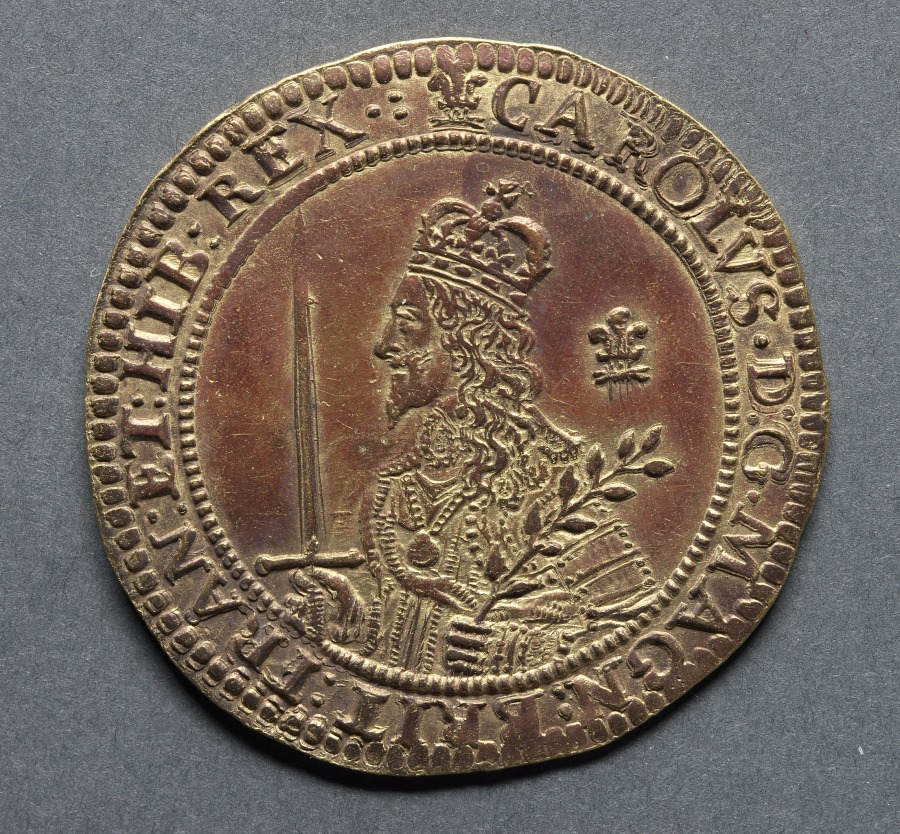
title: Triple Unite or Three Pound Piece: Charles I (obverse); Declaration on Scroll (reverse)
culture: England, Charles I, 1625-1649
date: 1643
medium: gold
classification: Coins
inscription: CAROLUS DG MAG BRIT FRAN ET HIB REX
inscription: III RELIG PROT LEG ANG LIBER PAR 1643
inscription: EXURGAT DEUS DISSIPENTUR INIMICI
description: When the Civil War or Great Rebellion started in 1642, Charles I, having raised his standard at Nottingham on August 22, 1642, fought his way south through the battles of Edgehill and Brentford, but failing to enter London he finally set up his headquarters at Christ Church College, Oxford. At Wellington, Shropshire, on September 19, the king had declared to the that he would protect "the religion of the Protestants, the laws of England, (and) the liberty of Parliament." This declaration, abbreviated and rendered in Latin, appeared on various denominations of the royal coinage as propaganda. In full it reads RELIGIO PROTESTANIUM LEGES ANGLIÆ LIBERTAS PARLIAMENTI. The plume initial mark does not now serve as a date indication as it did before the war started. This, the largest and heaviest type of gold coin ever to be struck in England, is very rare. It was doubtless made from local plate, so much of which, in gold and silver, the king "borrowed" from the colleges of Oxford and from his supporters, promising to repay when better times returned.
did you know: The Triple Unite, valued at three pounds, was only produced during the English Civil War between 1642 and 1644.